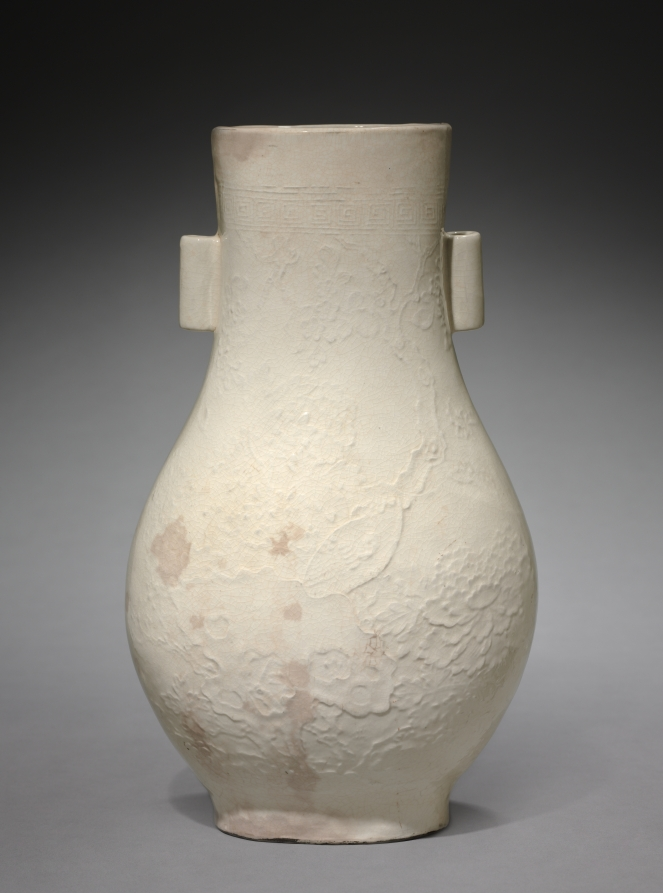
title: Vase: Ding ware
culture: China, Ming dynasty (1368–1644)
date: 1368–1644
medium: porcelain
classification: Ceramic